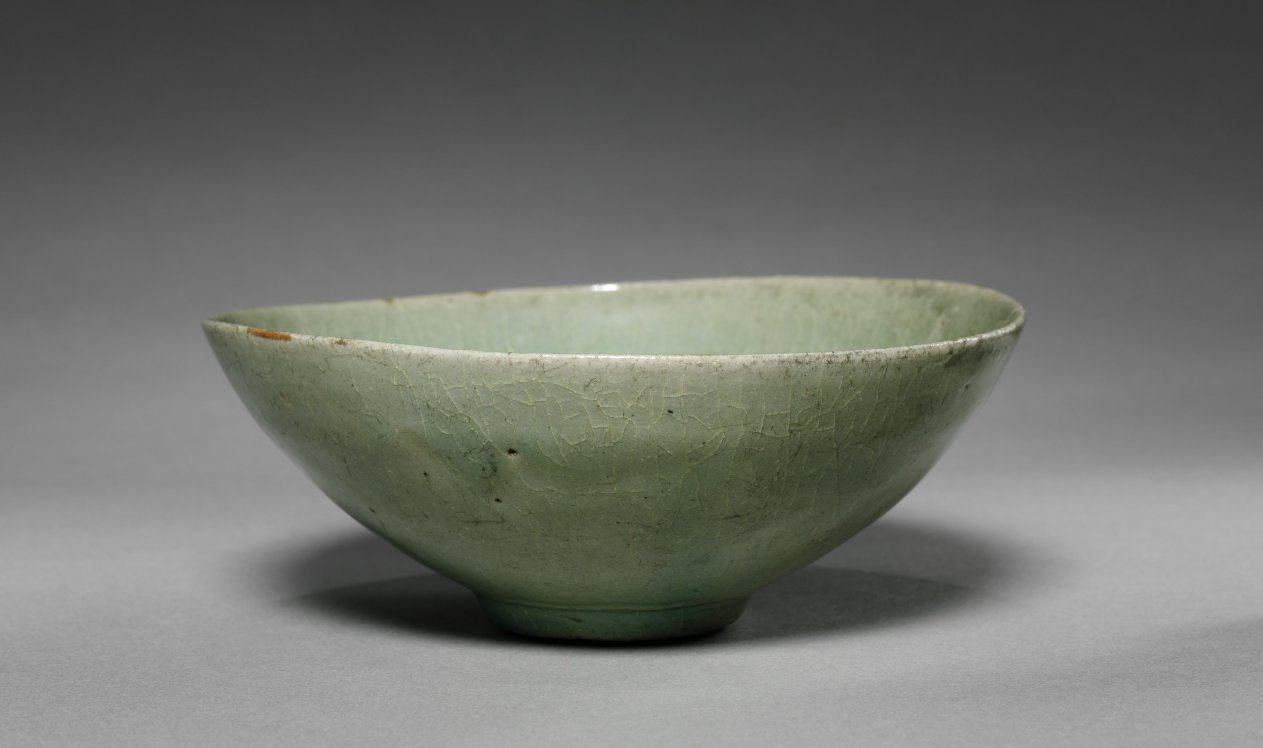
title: Bowl with Fish and Waves in Relief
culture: Korea, Goryeo dynasty (918–1392)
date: 1100s-1200s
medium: celadon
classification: Ceramic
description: As early as the seventh century, the practice of drinking tea and wine became an important part of elite leisure culture in Korea. A wide bowl like this example was especially suitable for drinking powdered tea shaved from a compressed tea cake, the most commonly enjoyed type during the Goryeo period. The image of fish swimming waves expressed in low relief on the inner wall of this tea bowl may have made the moment of drinking tea much enjoyable.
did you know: This tea bowl was part of the gifts donated by John L. Severance (1863–1936). He and his father Louis H. Severance (1838–1913) collected Korean ceramics of the Goryeo dynasty (918–1392) from a number of pioneering medical missionaries as a way to foster their activities in Korea, and later donated them to the Cleveland Museum of Art.